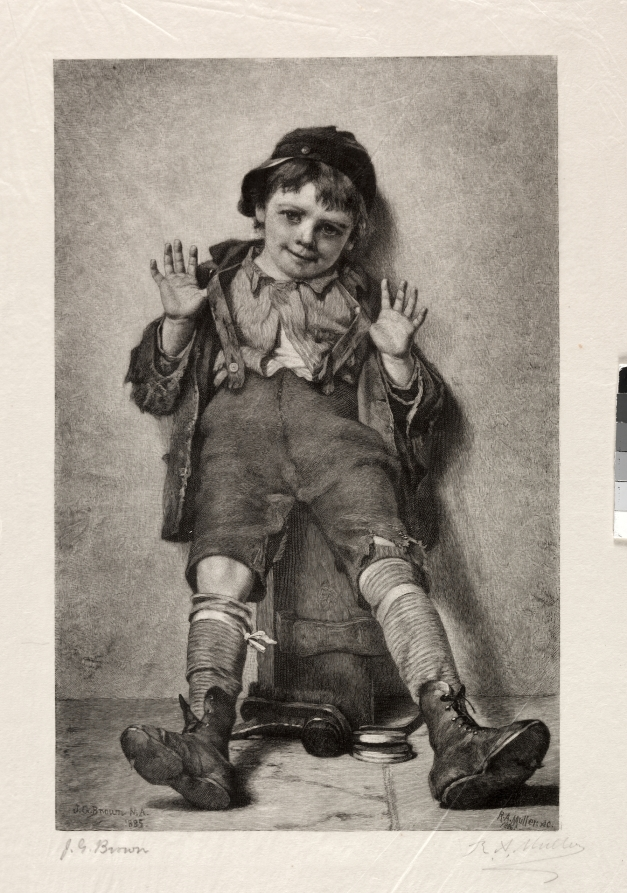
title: I'm Perfectly Happy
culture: America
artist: Richard Alexander Muller (American, 1850–1915)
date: 1886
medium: wood engraving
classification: Print